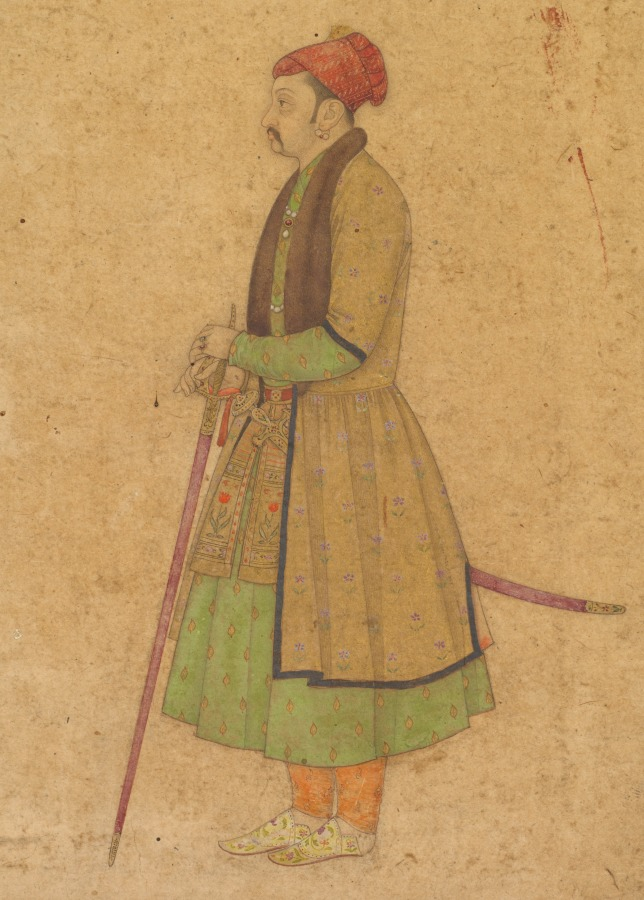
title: Portrait of Raja Ram Singh of Amber (r. 1667-1688) with a Deccan Sword (recto)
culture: India, Mughal, 17th century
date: c. 1680–85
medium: Gum tempera and gold on paper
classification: Painting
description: The sensitive, naturalistic rendering of weariness and forbearance in the face belies the trappings of favor bestowed on Ram Singh by the Mughal emperors Shah Jahan and Alamgir, whom he served as courtier and general between 1643 and 1688. He was a Hindu ruler from the kingdom of Amber in Rajasthan, under the control of the Mughal empire. Spending most of his life at the imperial court or leading military expeditions for the Mughals, this portrait was included in a Mughal album and inscribed with an Urdu verse indicating his value to the empire: "wherever he has led an expedition, victory is his." He wears a sumptuous coat of honor with a fur collar, woven with gold threads and floral sprigs and costly rubies, emeralds, and pearls. The straight sword with enameled hilt may be the one gifted to him by the emperor upon his succession to the throne as king of Amber in 1667. His long history of service at the imperial court, however, was checkered with troubles, including his allegiances with failed successors of Shah Jahan and the escape of the rebel Shivaji under his watch.